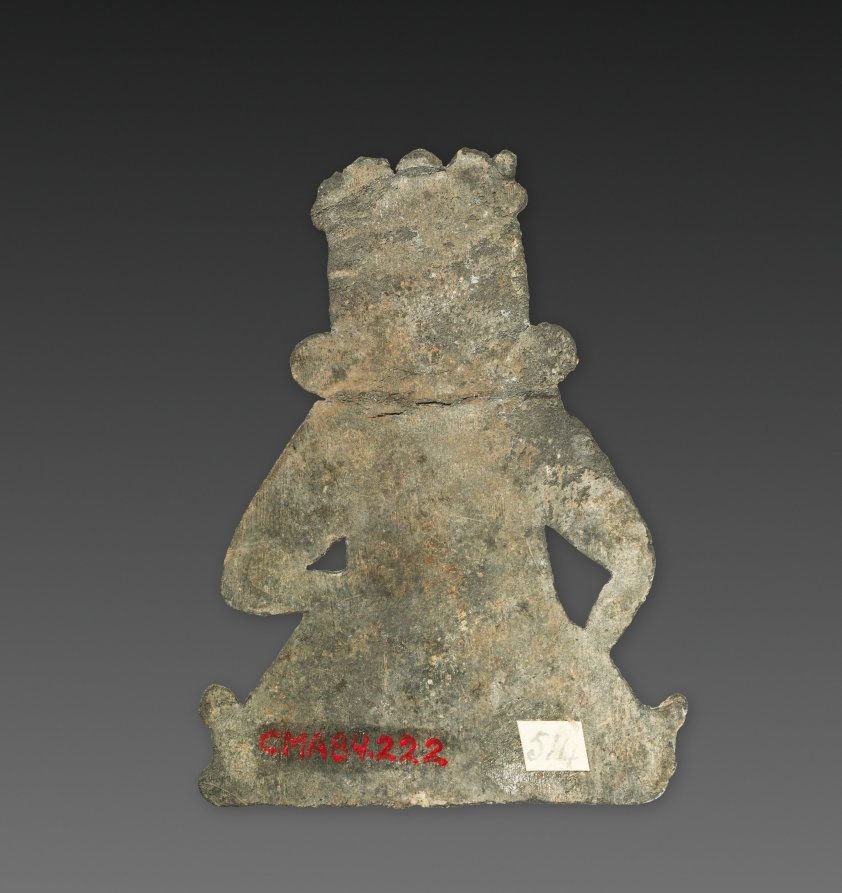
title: Seated Figure holding a Vase or Flask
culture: Iran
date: before 1984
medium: lead relief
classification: Sculpture